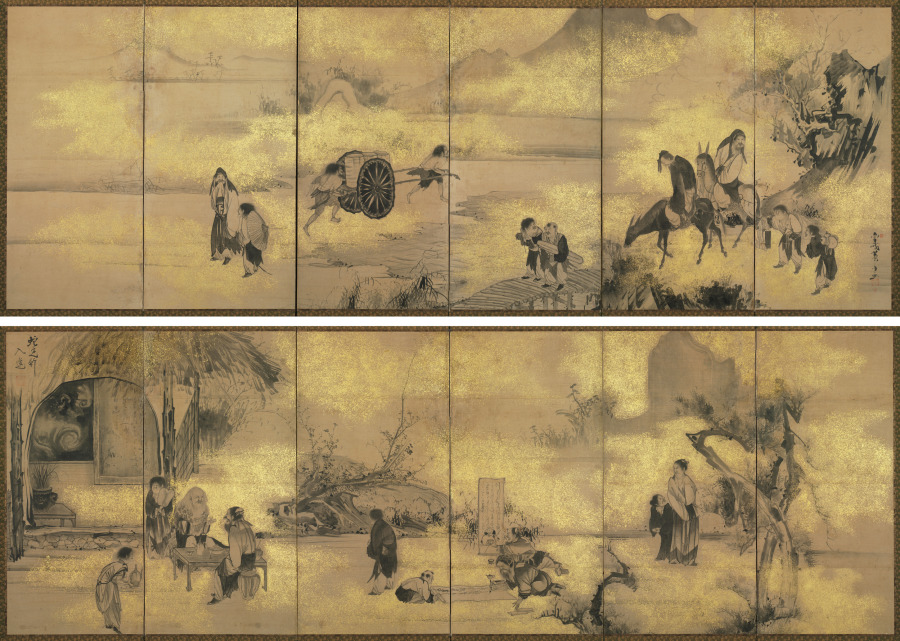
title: The Eight Immortals of the Wine Cup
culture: Japan, Edo period (1615–1868)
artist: Soga Shōhaku (Japanese, 1730–1781)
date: later 1700s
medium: pair of six-panel folding screens, ink and cut-gold foil on paper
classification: Painting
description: Responding to the desires of the middle class (chonin), some late Edo period Japanese painters moved away from the seriousness associated with the Chinese theme of reclusion, focusing instead on the motif’s humorous aspects. The theme Eight Immortals of the Wine Cup is based on a poem by the renowned 8th-century Chinese poet Du Fu about his eight colleagues. These scholars eagerly sought release from their official governmental duties and then supposedly fled the capital for the countryside. There, they engaged in wildly eccentric behavior and adventurous creative work, all fueled by copious amounts of wine. Shohaku’s version of events exaggerates the scholars’ pleasure, as seen in their comical facial expressions.